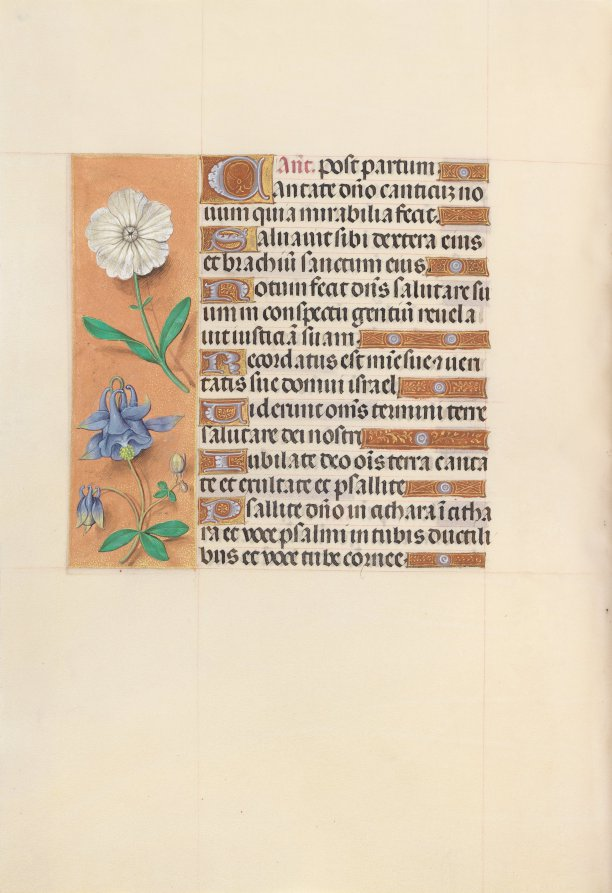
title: Hours of Queen Isabella the Catholic, Queen of Spain: Fol. 109v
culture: Flanders, Ghent and Bruges, late 15th century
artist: Master of the First Prayerbook of Maximillian (Flemish, c. 1444–1519)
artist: and Associates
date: c. 1500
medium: ink, tempera, and gold on vellum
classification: Bound Volume